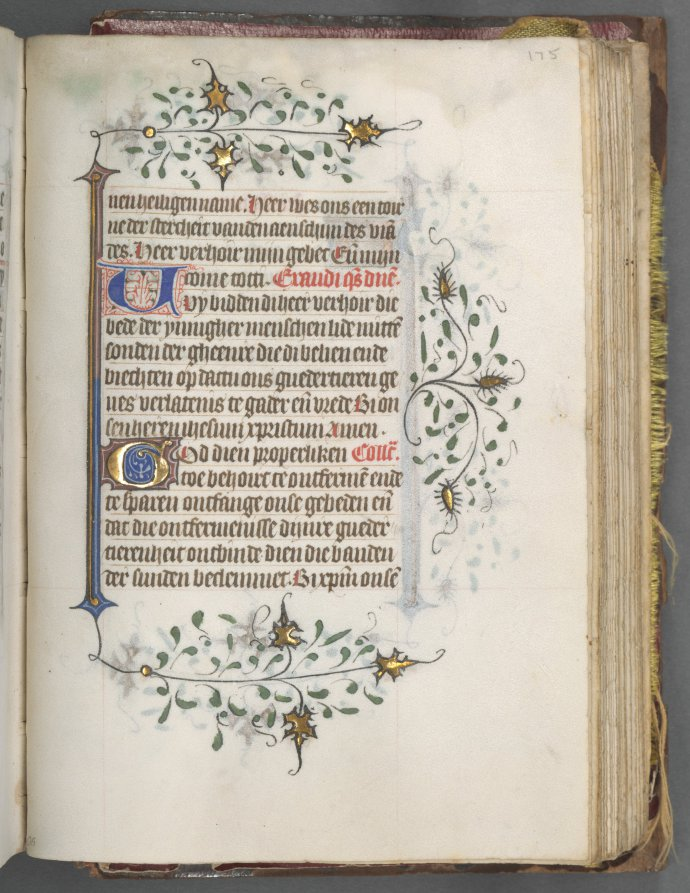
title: Book of Hours (Use of Utrecht): fol. 175r, Text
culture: Netherlands, Utrecht, 15th century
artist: Master of Gijsbrecht van Brederode (Netherlandish)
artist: Master of the Boston City of God (Netherlandish)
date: c. 1460–1465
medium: ink, tempera, and gold on vellum; binding: brown Morocco over original wooden boards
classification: Bound Volume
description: This manuscript is a collaborative effort of two talented illuminators with distinctive styles. Ninety-seven historiated initials (letters containing scenes), including the one on recto (right side) shown here, are by the Master of the Boston City of God, a painter who worked in Utrecht. Four full-page miniatures (small paintings), including the Nativity on the verso (left side), have recently been attributed to the Master of Gijsbrecht van Brederode. The background of the Nativity depicts a distant cityscape (perhaps Utrecht), adjacent to which may be seen the Journey of the Magi and the Annunciation to the Shepherds. In the left margin, the Virgin Mary (above) appears to the Roman Emperor Augustus and the Tiburtine Sibyl, who, according to legend, foretold the coming of Christ. This volume is not written in Latin, but in a Dutch littera textualis, an elegant Gothic bookhand.